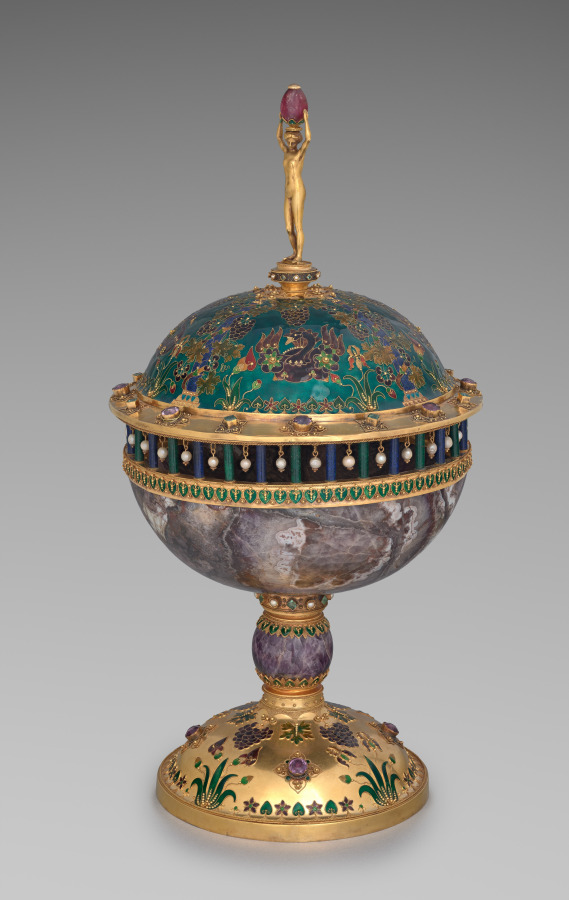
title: Covered Cup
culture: France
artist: Armand Point (French, 1861–1932)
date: c. 1897–99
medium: gilt copper alloy, enamel, amethysts, emeralds, ruby, pearls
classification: Metalwork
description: Armand Point started his career as a painter, but in the late 1800s, he became increasingly interested in decorative arts. In 1896, he established the Atelier de Haute-Claire in Marlotte, a colony of artists who handmade works of art to a very high standard. This cup was made there and is particularly ornate, showcasing different materials such as metal, enamels, gemstones, and pearls, as well as goldsmithing techniques.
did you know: The cup was originally acquired by Émile Nail-Démellette, Point's old high-school friend and later his benefactor.